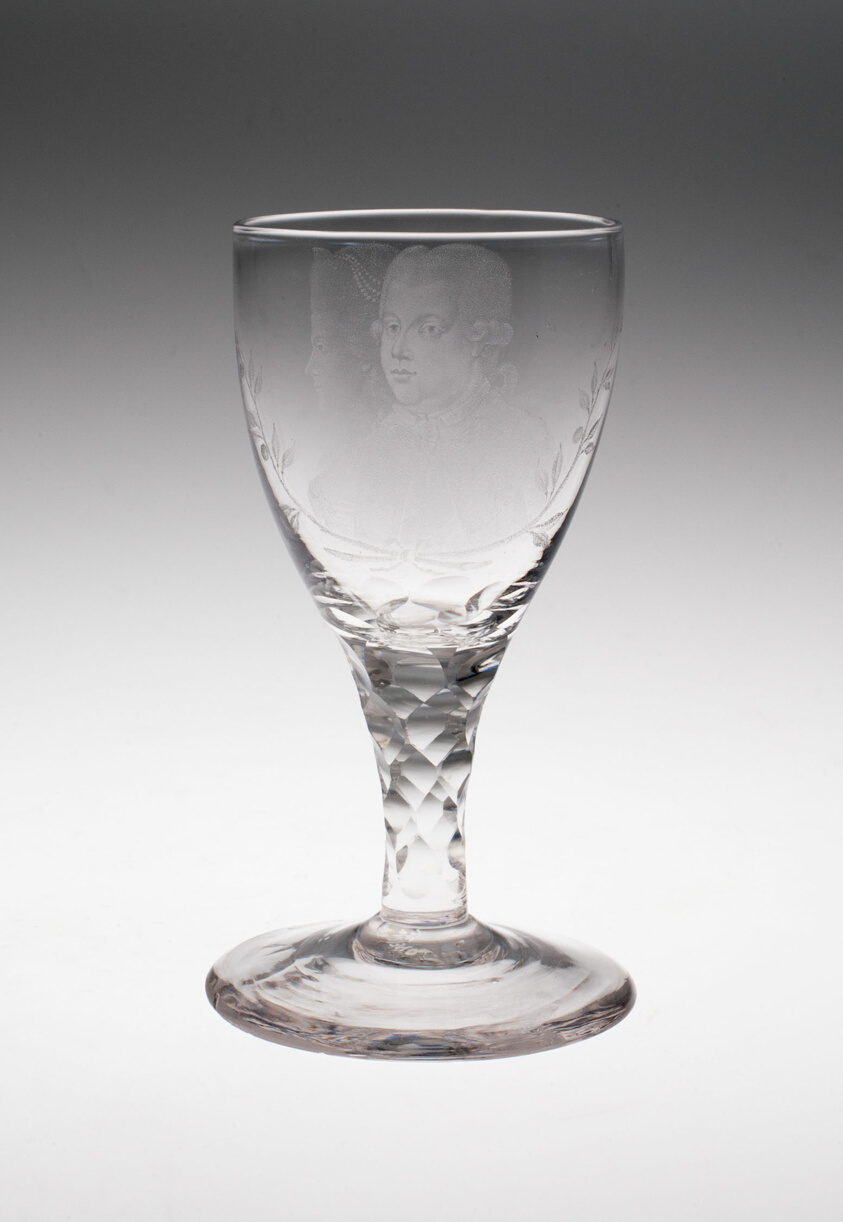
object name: Glass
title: Wine Glass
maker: Netherlands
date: c. 1790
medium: Glass; cut and stipple engraved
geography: England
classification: drinking vessel; glass; european decorative arts